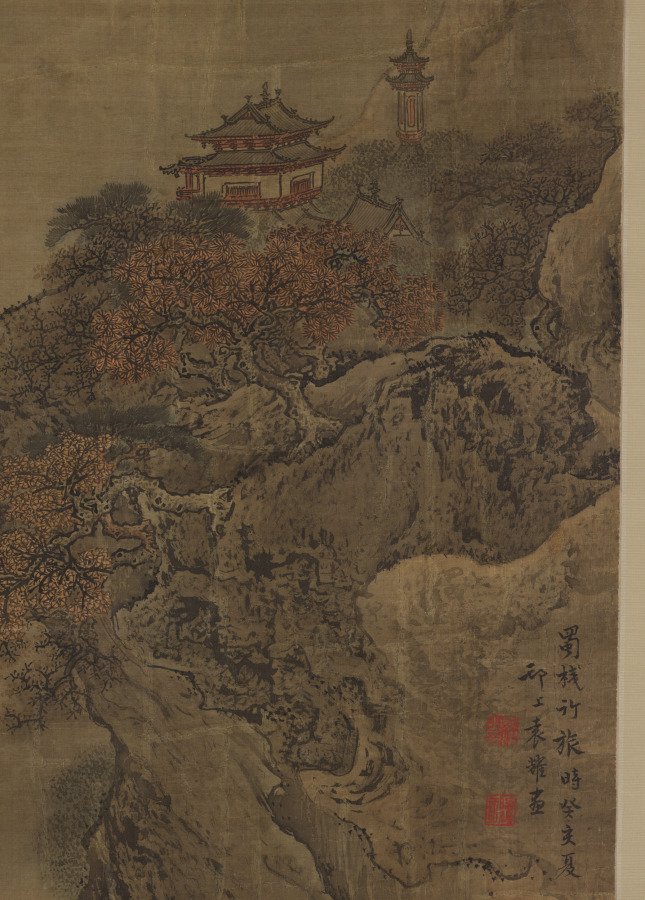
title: Road to Shu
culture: China, Qing dynasty (1644–1911), Qianlong reign (1736–95)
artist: Yuan Yao (Chinese, active mid-1700s)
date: 1743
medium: Hanging scroll; ink and color on silk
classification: Painting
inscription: artist's seals: yuan yao shi yin 袁耀 之印, zhao dao shi 昭道 氏 two collector’s seals: jin ju and illegible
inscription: Shu han xinglü //shi guihai xia //Hanshang Yuan Yao hua// 蜀椷行旅时癸亥夏- 邗上 袁耀 画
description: Few works by the Yuan workshops in Yangzhou present a continuous composition of such monumental scale as this hanging scroll. Road to Shu (in Sichuan province) depicts the trade of goods over long distances and through mountainous terrain. Busy travelers lead mules over footbridges, mountain paths wind along steep slopes, and soaring bridges connect peaks divided by deep gorges. The Yuan studios produced paintings to decorate the residences of wealthy Yangzhou salt merchants and princely palaces. The title Road to Shu refers to the historical drama of the flight of Tang emperor Xuanzong (reigned 712–56) to Sichuan in the aftermath of the An Lushan Rebellion (755–63). At the same time, the scenery alludes to Anhui, the mountainous native country of many of the salt merchants and their trade routes in northern parts of the empire.